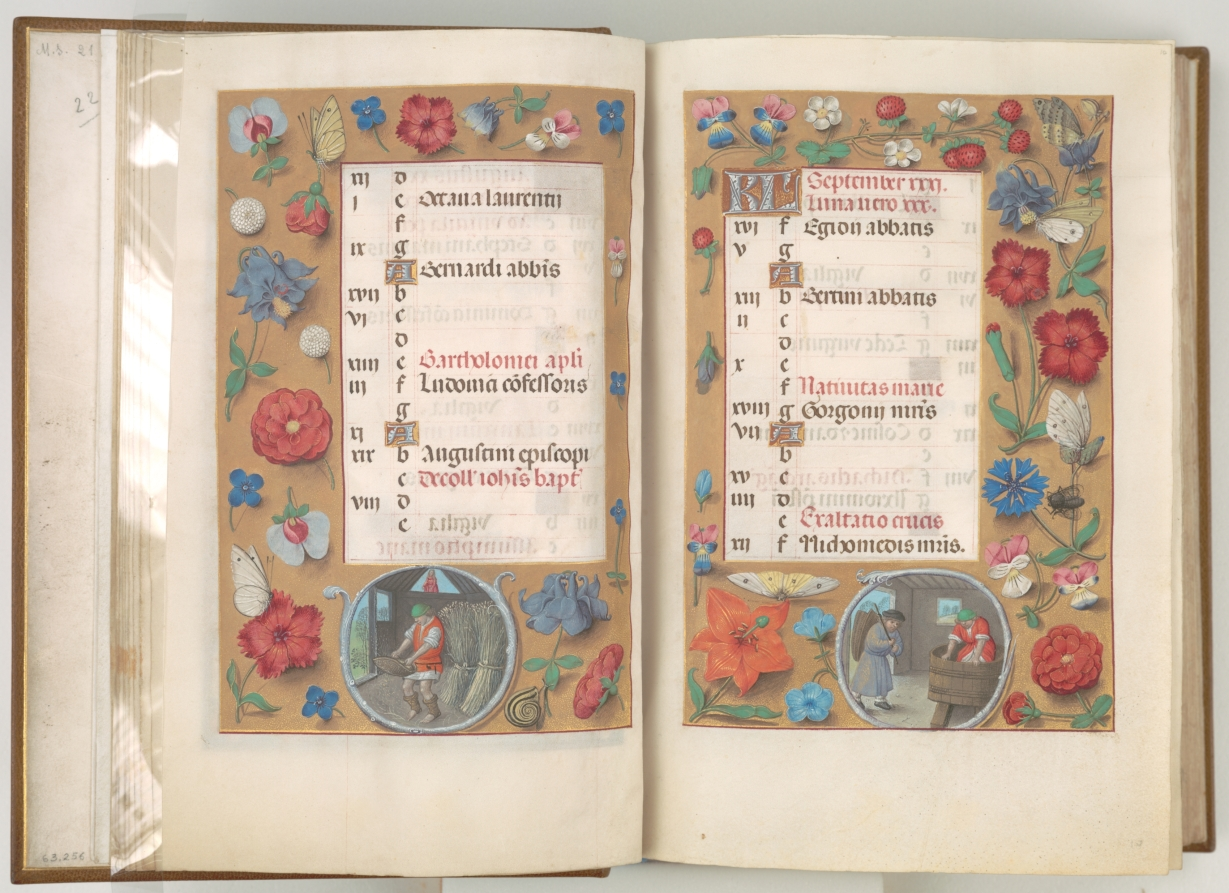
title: Hours of Queen Isabella the Catholic, Queen of Spain: Fol. 10r, September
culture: Flanders, Ghent and Bruges, late 15th century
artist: Master of the First Prayerbook of Maximillian (Flemish, c. 1444–1519)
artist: and Associates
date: c. 1500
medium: ink, tempera, and gold on vellum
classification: Bound Volume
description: This manuscript was illuminated by a circle of at least five highly organized manuscript painters active in the Flemish cities of Ghent and Bruges. The principal illuminator was Alexander Bening, who painted the majority of the book's miniatures. Manuscripts produced by this circle of artists are renowned for the decoration of their borders, which typically feature a rich variety of realistically-painted flowers, birds, and butterflies. This prayer book, called a book of hours, was intended not for a cleric, but for the private devotions of a lay person-in this case, Isabella the Catholic, Queen of Spain (1451-1504). Isabella's coat of arms embellishes the book's frontispiece. It is unlikely that the book was commissioned by the Queen herself; rather, she probably received it as a diplomatic gift from someone courting her patronage, perhaps Cardinal Francisco Jimenez de Cisneros. A Franciscan friar, Jimenez was dependent upon Isabella for his advancement, first to the post of Queen's confessor in 1492, and then to Archbishop of Toledo in 1495.